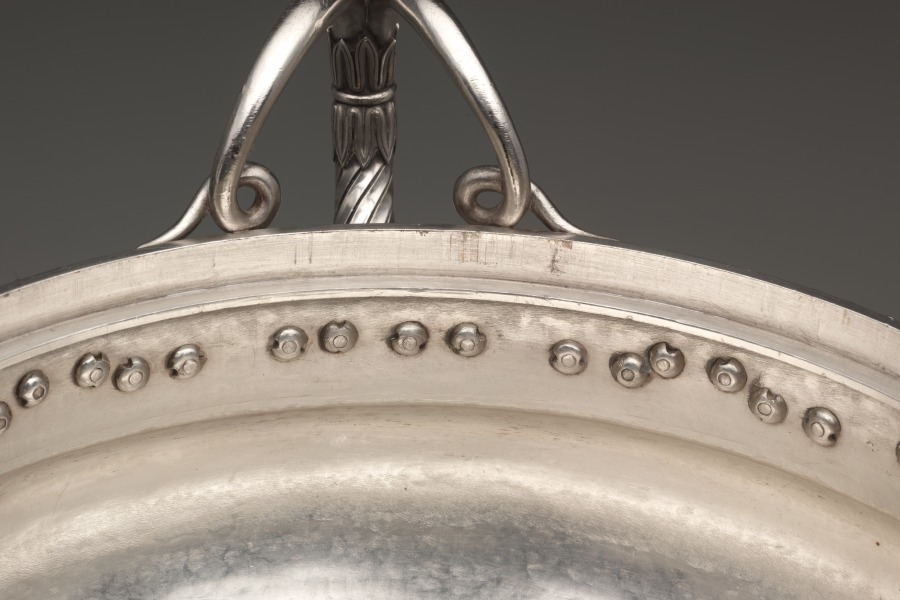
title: Covered Tureen on Stand (Pot à oille)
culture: France, late 18th-early 19th Century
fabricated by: Henry Auguste (French, 1759–1816)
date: 1797–98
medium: silver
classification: Silver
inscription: [Coat-of-arms of Amoral don Federico Carlos Gravina on bowl; cover; stand]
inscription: [Assay mark for large-sized work, 1798-1809, lining exterior; tureen foot exterior]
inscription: [Assay mark for medium-sized work, 1798-1809, beneath stand foot; on edge of cover]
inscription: [Maker's mark of Henri Auguste, master silversmith in 1785, beneath tureen foot; beneath stand foot; inside stand foot edge]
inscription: [Official assay mark for first standard silver, Paris, 1798-1809, beneath stand foot; lining exterior; on cover]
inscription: [Official mark for silver imported from countries with customs conventions, 1838-1912, beneath stand foot; edge of cover; tureen lip exterior; lining exterior; on one tureen handle; outside stand foot; tureen foot exterior]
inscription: [Unknown mark, possibly Ceres' profile in square with "E" and "7", beneath stand foot; on cover; rim of lining; tureen foot exterior; tureen lip exterior]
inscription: [Unofficial assay mark for first standard silver, Paris, 1794-1797, beneath foot stand; beneath tureen foot; near tureen handle exterior]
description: This pot-à-oille was designed by master goldsmith Henri Auguste after drawings by draftsman and sculptor Jean Guillaume Moitte. Though many of the neoclassical decorative elements on this piece are pulled from Moitte’s design, Auguste’s final product leaves out much of the proposed ornamentation. Instead this object finds distinction in its large size and smooth expanses of silver that emphasize the purity of its lines.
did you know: The coat of arms on the body of the work corresponds to the family of Federico Carlos Gravina, a Sicilian-Spanish admiral who was known to have had a close diplomatic relationship with Napoleon I.